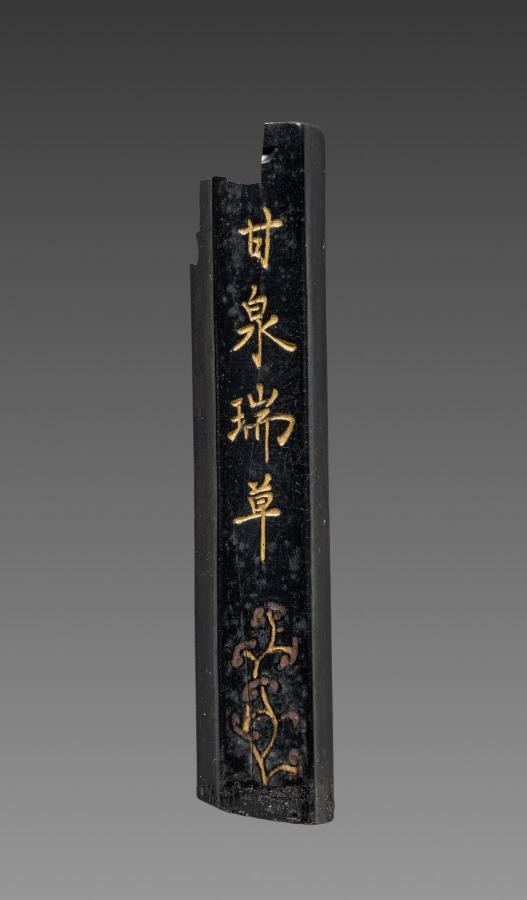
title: Ink Cake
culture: China, Qing dynasty (1644-1911)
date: 19th Century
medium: ink cake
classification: Miscellaneous